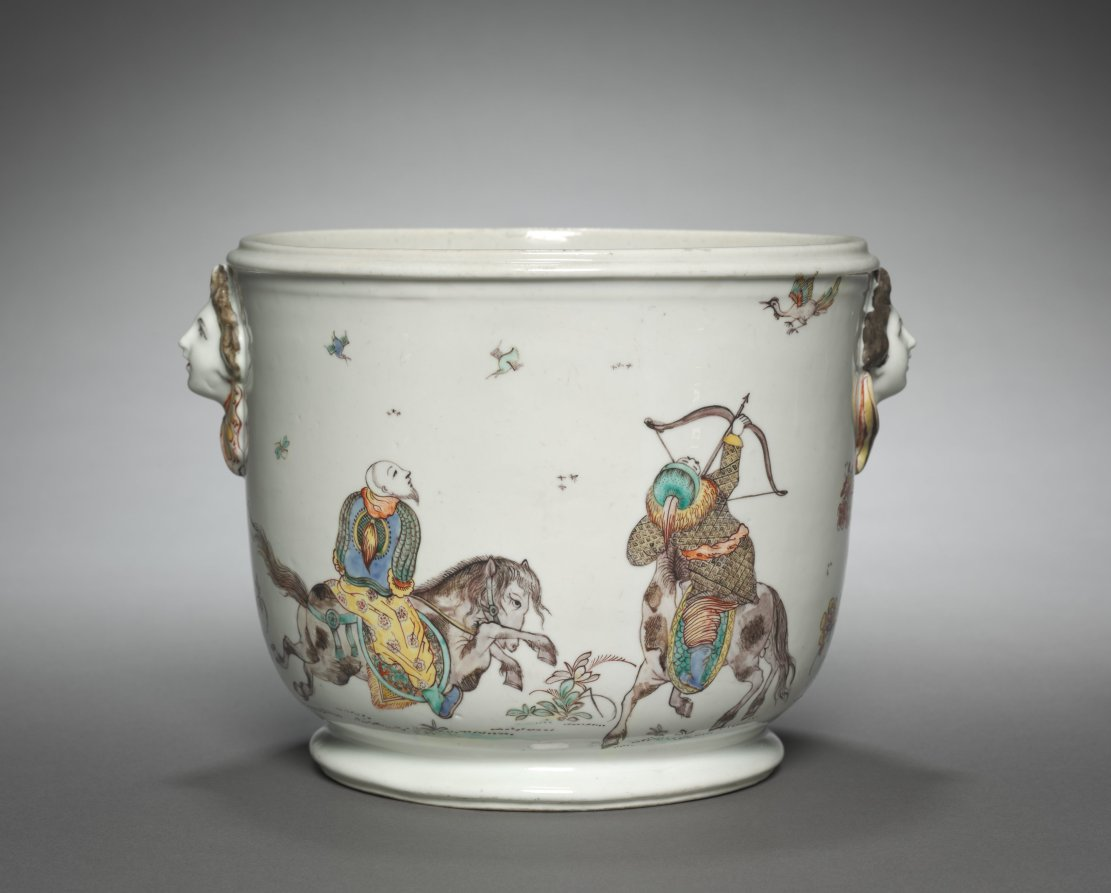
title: Bottle Cooler (seau a bouteille)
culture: France, Mennecy, 18th century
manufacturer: Mennecy- Villeroy Factory (French)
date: c. 1755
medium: Tin-glazed soft-paste porcelain with enamel decoration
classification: Ceramic